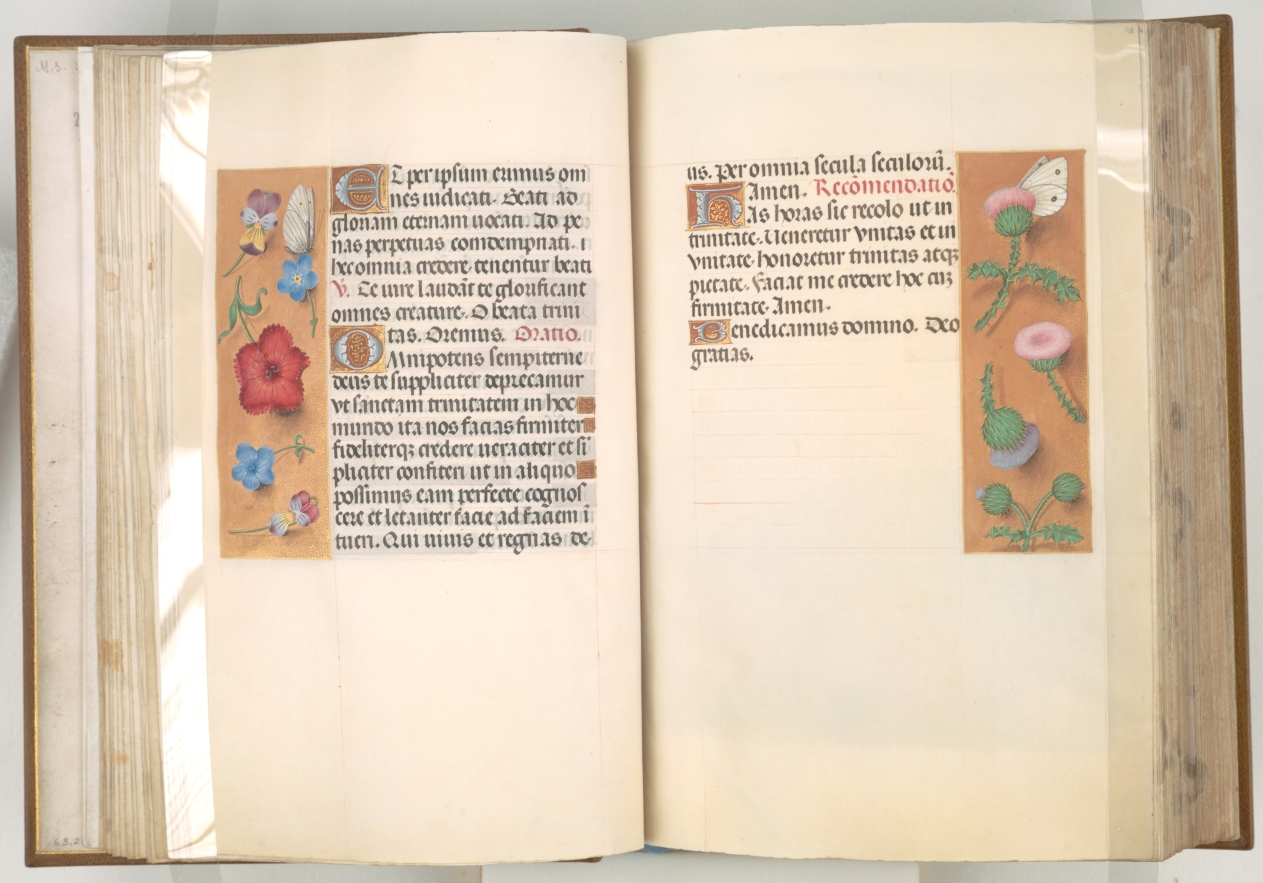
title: Hours of Queen Isabella the Catholic, Queen of Spain: Fol. 22v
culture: Flanders, Ghent and Bruges, late 15th century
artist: Master of the First Prayerbook of Maximillian (Flemish, c. 1444–1519)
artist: and Associates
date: c. 1500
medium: ink, tempera, and gold on vellum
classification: Bound Volume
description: This manuscript was illuminated by a circle of at least five highly organized manuscript painters active in the Flemish cities of Ghent and Bruges. The principal illuminator was Alexander Bening, who painted the majority of the book's miniatures. Manuscripts produced by this circle of artists are renowned for the decoration of their borders, which typically feature a rich variety of realistically-painted flowers, birds, and butterflies. This prayer book, called a book of hours, was intended not for a cleric, but for the private devotions of a lay person-in this case, Isabella the Catholic, Queen of Spain (1451-1504). Isabella's coat of arms embellishes the book's frontispiece. It is unlikely that the book was commissioned by the Queen herself; rather, she probably received it as a diplomatic gift from someone courting her patronage, perhaps Cardinal Francisco Jimenez de Cisneros. A Franciscan friar, Jimenez was dependent upon Isabella for his advancement, first to the post of Queen's confessor in 1492, and then to Archbishop of Toledo in 1495.